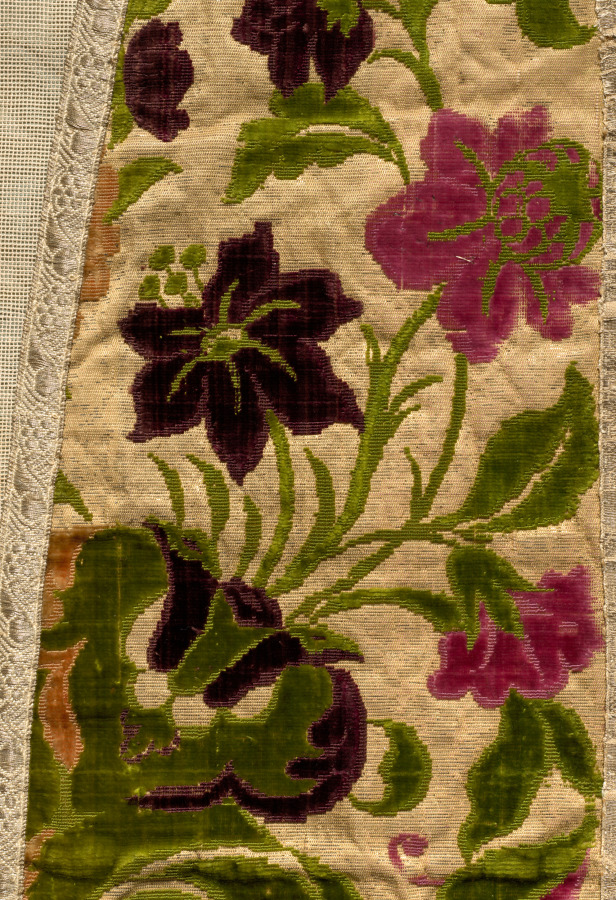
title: Chasuble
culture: Italy, Genoa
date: c 1600–1700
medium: Silk and gilt metal threads, woven; cut and uncut velvet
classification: Velvet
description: This sumptuous polychrome velvet displays a central vase with abundant flora and exotic leaves flanking curving blossoming fronds on a gilt-metal thread ground. The pattern was created with five colors of cut and uncut (loops) velvet pile. Only the pile warps for the lush green velvet occur across the entire cloth, while each additional color appears in vertical stripes—crimson, peach, rose, and purple. These widely acclaimed velvets from Genoa were the most colorful woven in Europe. Both the long stole and the shorter maniple are insignia of the office of deacons, priests, and the higher clergy. The stole was worn under a chasuble according to the office and the maniple was hung on the left forearm. The burse is a stiff receptacle in which the folded corporal, a white linen cloth on which the sacred bread and chalice are placed during the Mass, is carried to and from the altar. The upper fabric matches the chasuble, the bottom is a plain silk, and the interior has an obligatory linen lining.